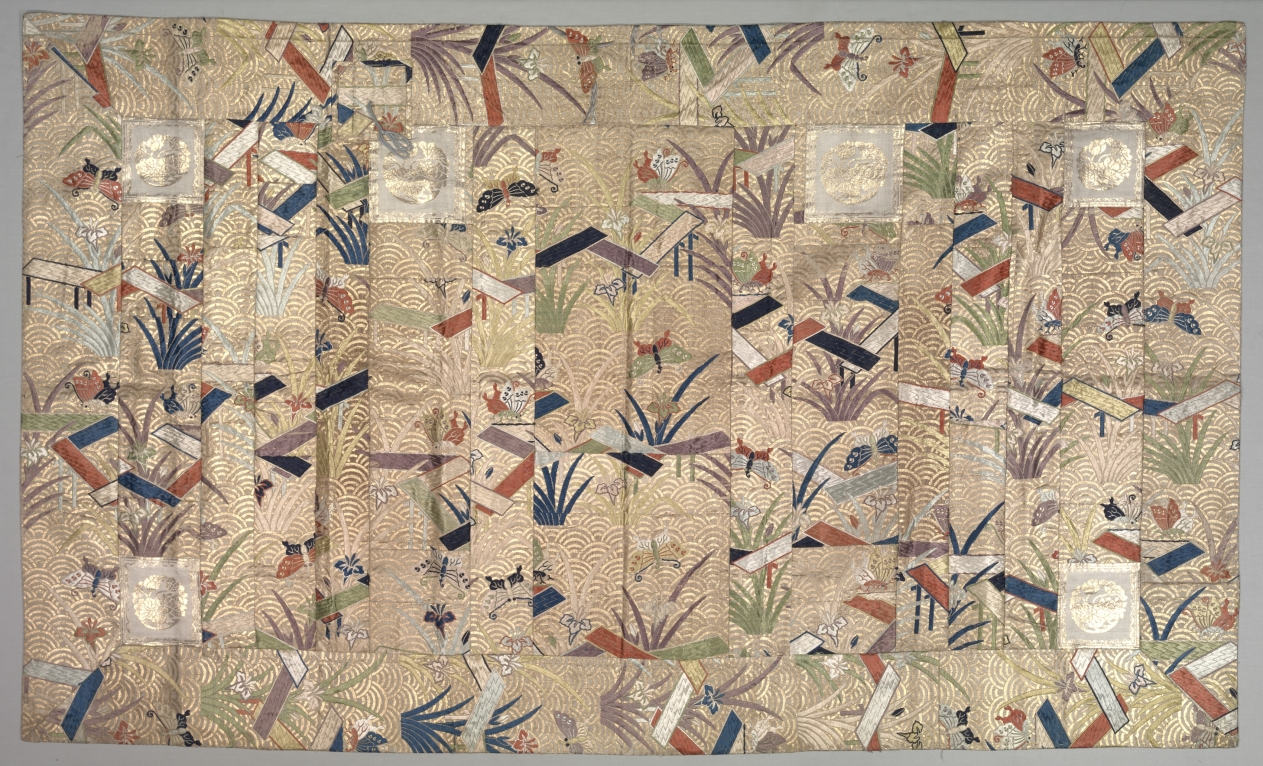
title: Buddhist Surplice (Kesa)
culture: Japan, Meiji period (1868–1912)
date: early 1900s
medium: silk with supplementary weft, brocaded; metal thread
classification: Garment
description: The kesa is a Buddhist monk’s vestment worn folded and draped over one shoulder, and fastened over the chest. In keeping with the austere conditions of monastic life, kesa were traditionally fashioned from remainders of donated garments sewn together into a series of columns. The wider, central column symbolizes the Buddha. The squares with golden roundels in each corner represent the deities who guard the four directions, while the two at the top on either side of the central column symbolize attendant bodhisattvas, or the Nio, guardians who protect the Buddhist Law. This kesa is sewn from a textile with a butterfly and "eight bridges" (yatsuhashi) pattern.